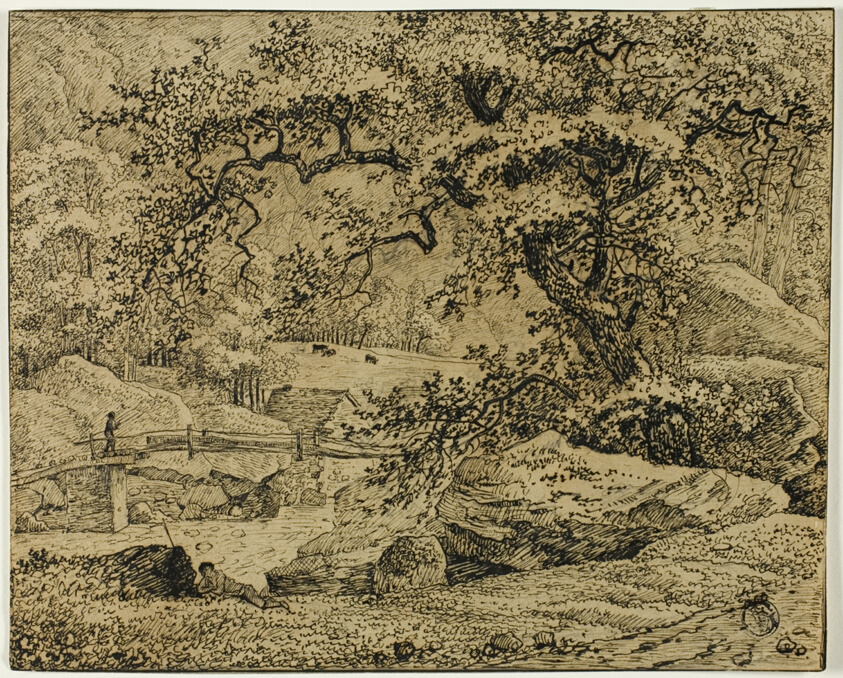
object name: Drawing and Watercolor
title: Landscape with Figure Resting Under Tree by Stream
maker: Jacob van Ruisdael (Dutch, 1628/29-1682)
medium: Pen and black ink over graphite, on tan laid paper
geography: Holland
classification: pen and ink drawings; drawings (visual works); prints and drawing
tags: landscapes